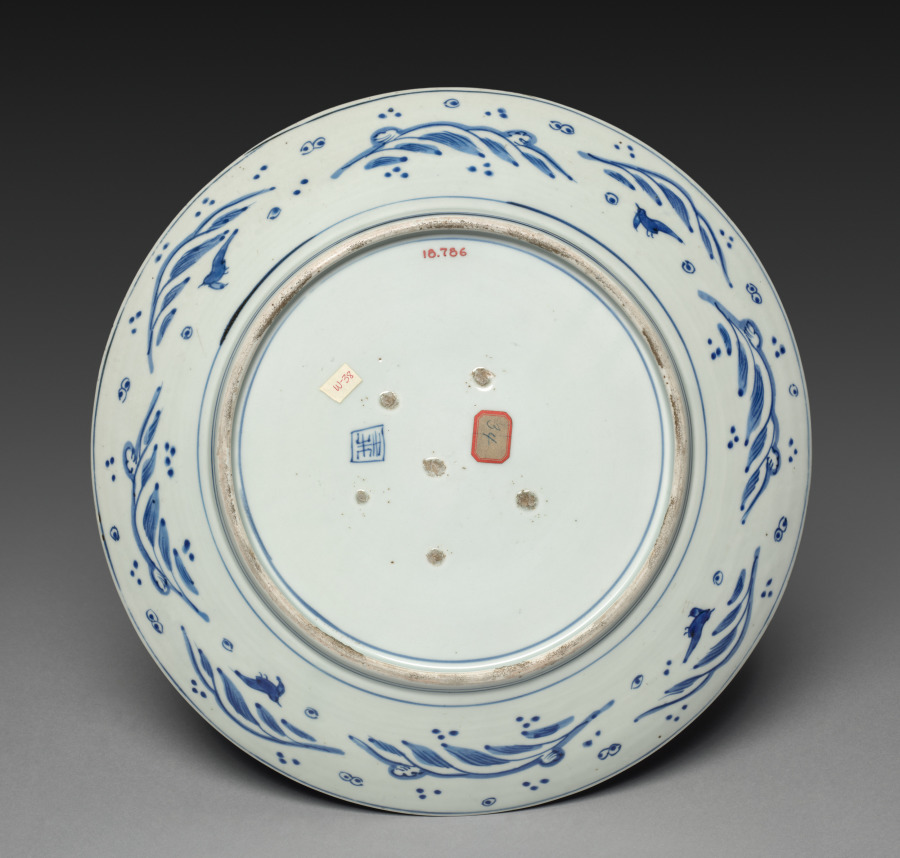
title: Dish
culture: Japan, Edo period (1615–1868)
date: early to mid-1800s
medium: porcelain with underglaze blue (Hizen ware, Kutani type)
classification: Ceramic